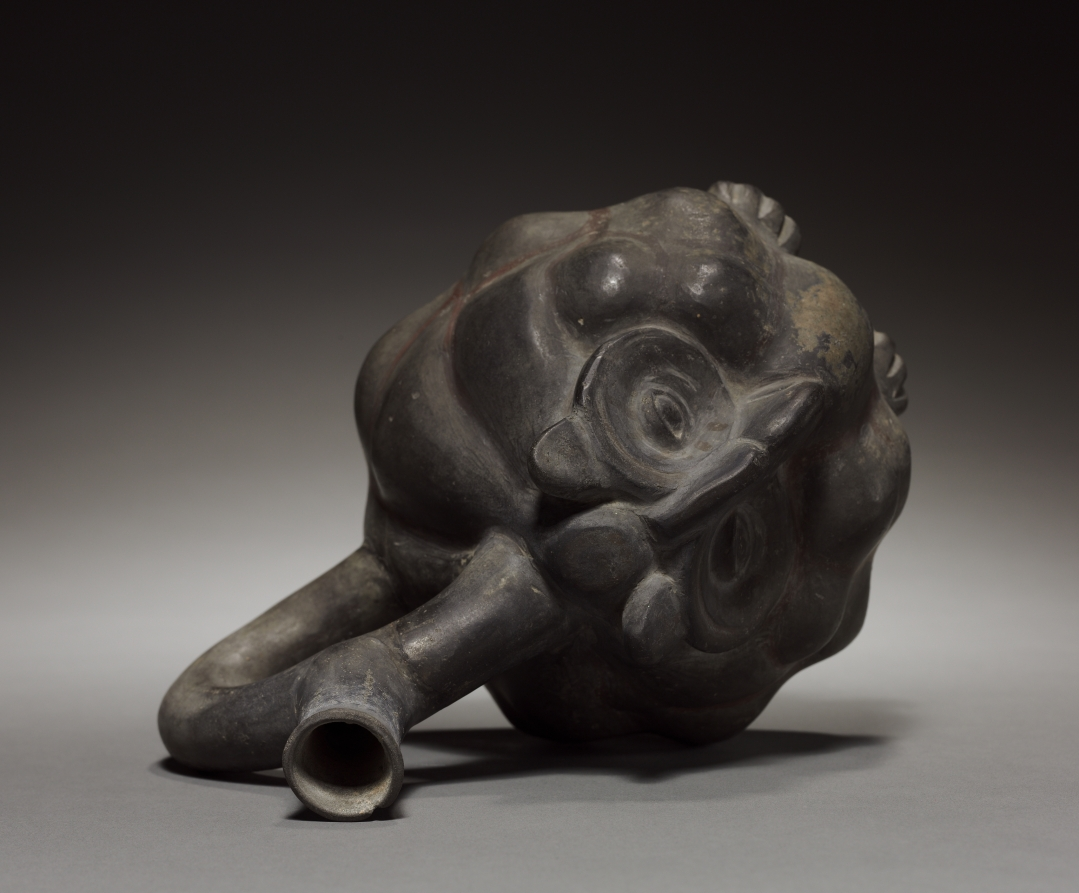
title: Bottle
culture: Peru, Chimú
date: 900–1470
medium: black ware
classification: Ceramic